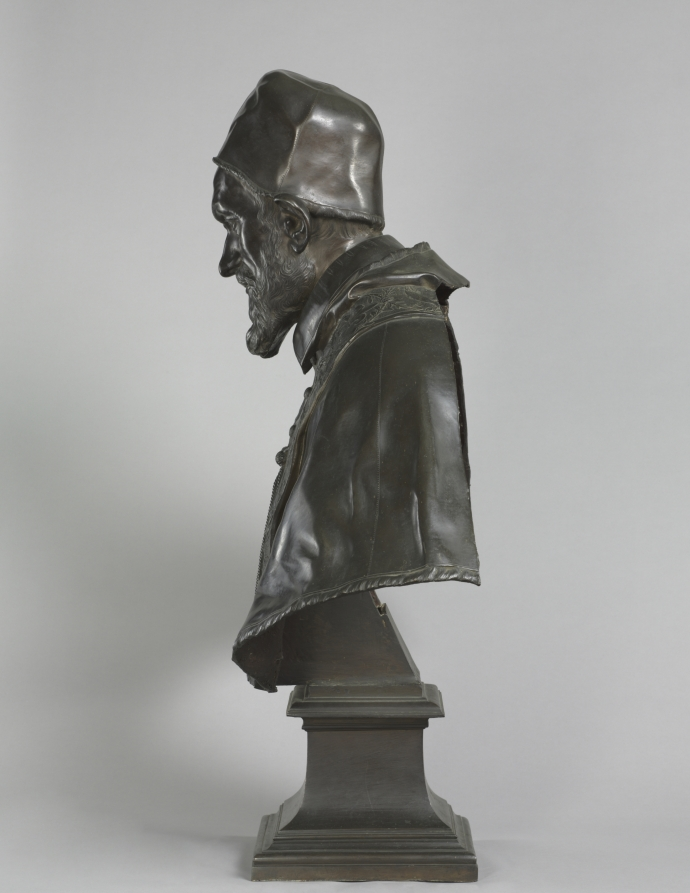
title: Portrait of Pope Innocent X Pamphili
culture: Italy, 17th century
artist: Alessandro Algardi (Italian, 1598–1654)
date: designed 1647–48; cast 1650–1700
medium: bronze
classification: Sculpture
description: Innocent X (Giovanni Battista Pamphili) was pope from 1644 until his death in 1655. Although he was not very interested in the visual arts, he followed tradition and gave several papal commissions for artistic projects. Algardi was the sculptor most frequently called upon by Innocent X. This sensitive portrait captures many details of the pope's costume as well as his intelligent, quiet face.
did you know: The pope's stole features Pamphili family emblems: fleur-de-lis and doves encircled by olive leaves.